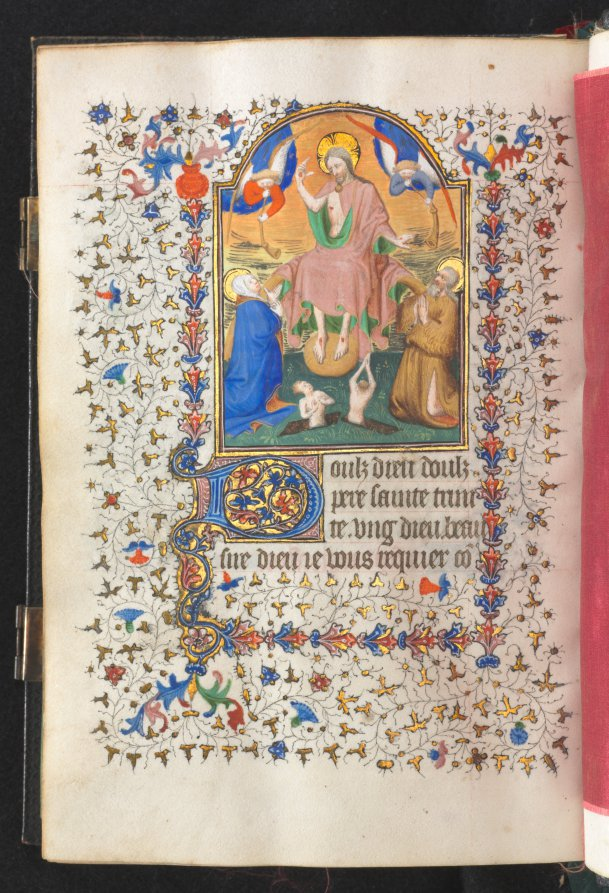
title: Book of Hours (Use of Paris): Fol. 204v, Last Judgment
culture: France, Paris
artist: possibly studio or workshop of The Bedford Master (French, Paris, active c. 1405–30)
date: c. 1420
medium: ink, tempera, and gold on vellum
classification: Bound Volume